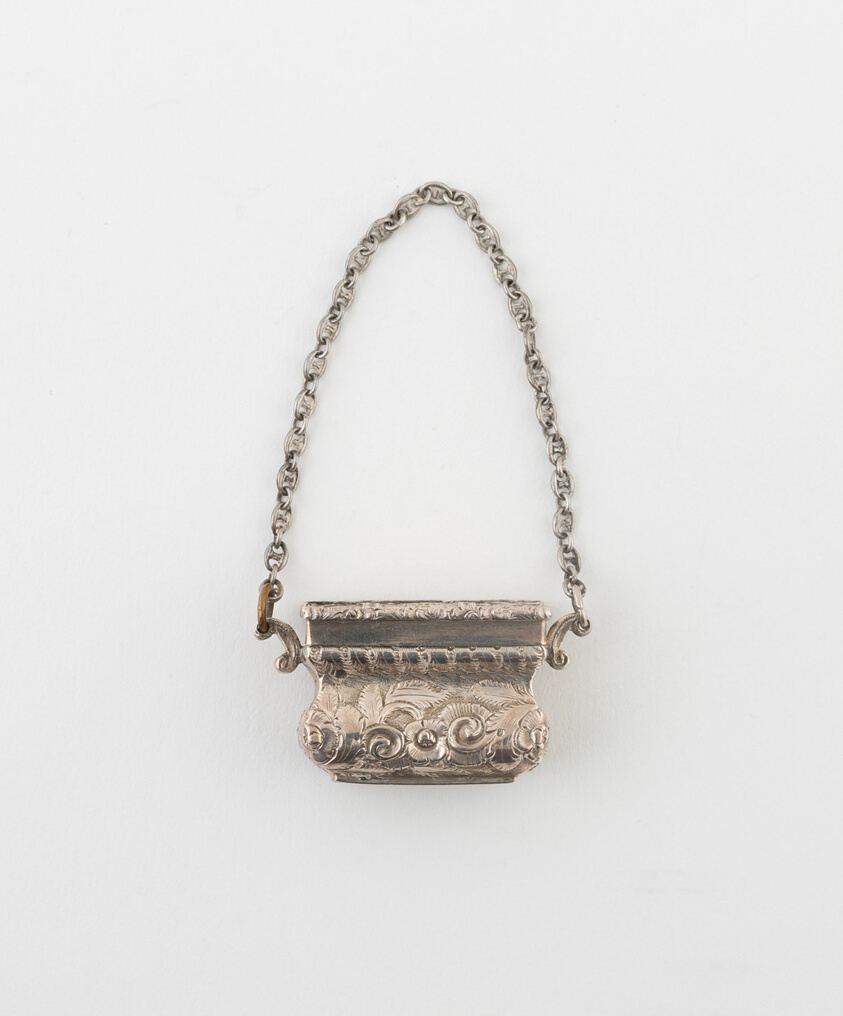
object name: Metalwork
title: Purse-Shaped Vinaigrette with View of Windsor Castle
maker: Marked JT; Birmingham, England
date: 1843/44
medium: Silver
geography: Birmingham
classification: vinaigrette (container for health care); container for personal use; box; european decorative arts; metalwork; silver; decorative object/ornament